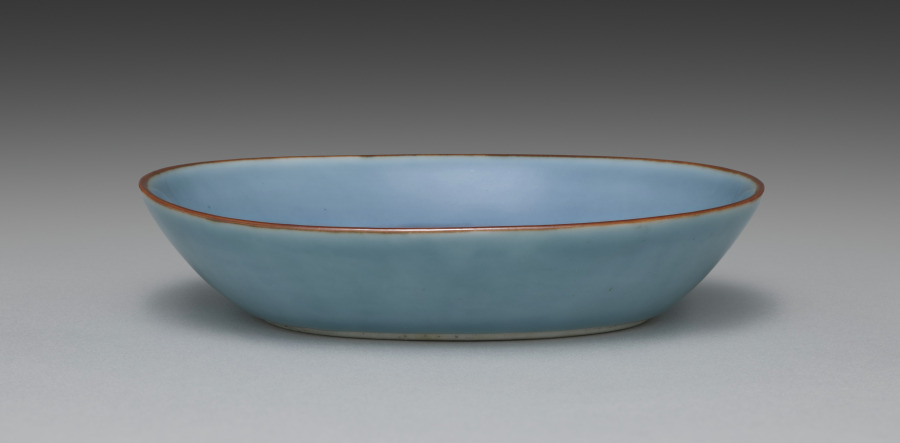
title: Dish from Dishes with Shells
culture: Japan, Taishō period (1912–26)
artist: Seifū Yohei IV (Japanese, 1872–1951)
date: 1914–46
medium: One from a set of five dishes; porcelain with blue glaze, iron oxide, and molded design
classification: Ceramic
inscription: 清風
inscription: 清風造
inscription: 清風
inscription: 成山清風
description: Yohei IV chose an aquatic theme for this set of five mukōzuke, side dishes. He added an iron oxide rim and used a concentrated blue glaze on both the interior and exterior. The glaze, named on the box lid, is his father’s “evening moon” (tsukiyoi) color. The conch in relief takes up the entire bottom of the dish. Up the sides are two snails on one end and on the other a scallop. This results in a boldly graphic, less realistic effect.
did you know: This set of dishes, mukōzuke, could be used for serving small side dishes at a tea gathering.